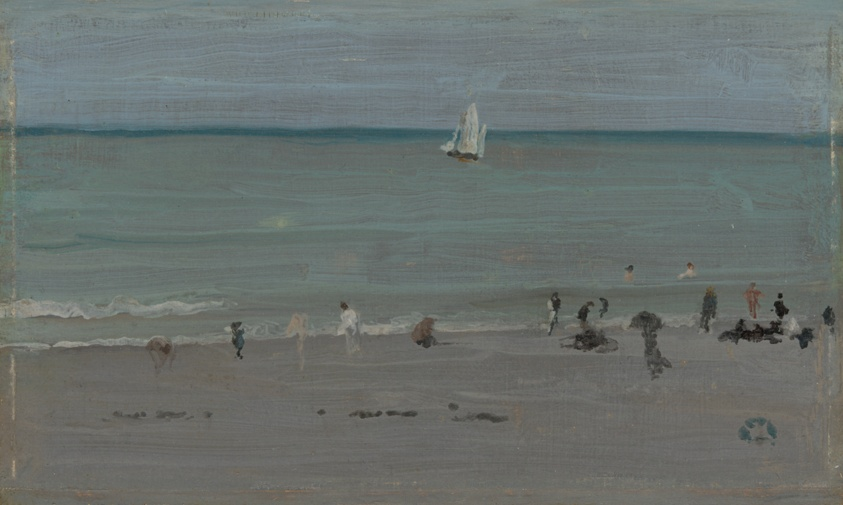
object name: Painting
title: Coast Scene, Bathers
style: Impressionism, Modernism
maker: James McNeill Whistler (American, 1834–1903)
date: 1884–85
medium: Oil on panel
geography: United States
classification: painting; american arts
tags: landscapes